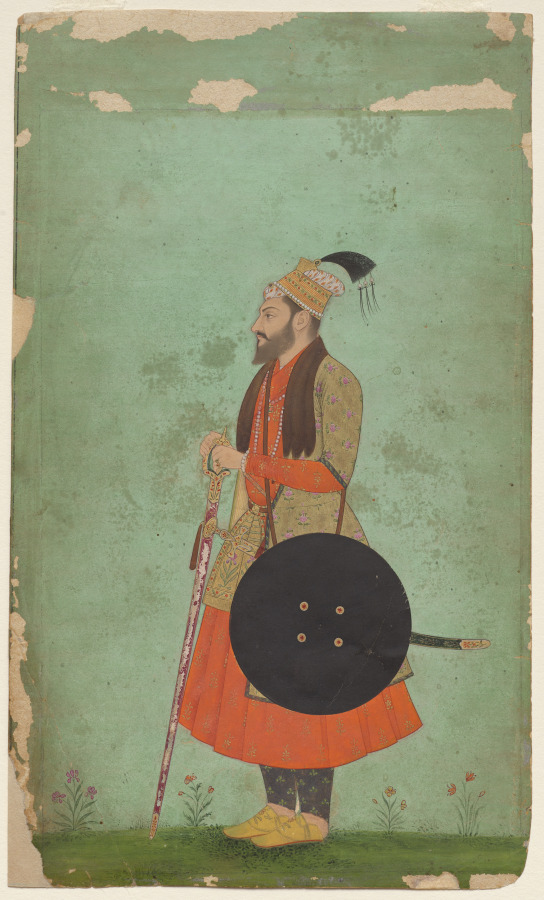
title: Portrait of Prince Murad Baksh (1624–1661)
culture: Mughal India, court of Shah Jahan (1627–58)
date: c. 1655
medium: Gum tempera and gold on paper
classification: Painting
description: This portrait depicts the Mughal prince Murad Baksh in his early 30s, at the height of his power and promise. He wears a golden coat of honor with fur collar and the swords and shield of a military officer. As the youngest son of Emperor Shah Jahan, he was intimately involved in the struggles for succession. In 1658, he sided with his brother Aurangzeb (1618–1707) against their eldest brother, the crown prince, whom they defeated in a decisive battle that led to the crown prince’s eventual assassination in 1659. Aurangzeb then turned on his youngest brother, Murad Baksh himself, and had him imprisoned and finally executed in 1661.